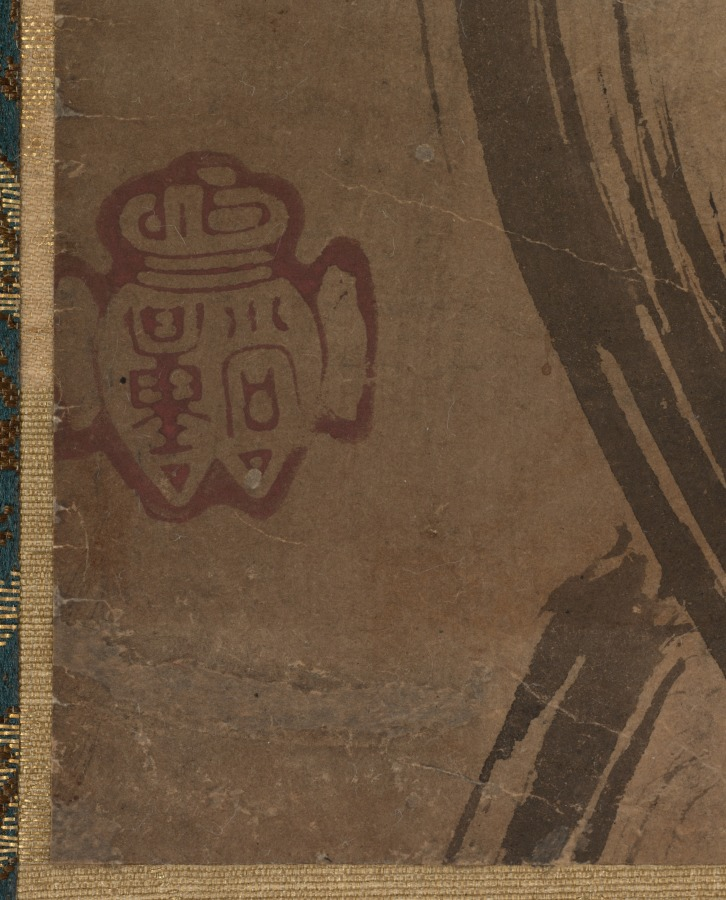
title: Shennong (Shinnō)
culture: Japan, Muromachi period (1392–1573)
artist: Shōryō (Japanese)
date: late 1400s–early 1500s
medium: hanging scroll; ink on paper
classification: Painting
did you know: Shennong legendarily taught people how to farm and also how to use plants as medicine.